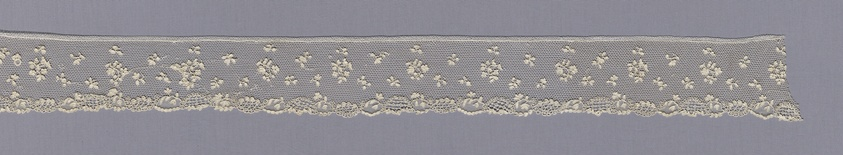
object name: Textile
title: Border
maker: France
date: 1775/1800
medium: Linen, needle lace of a type known as "Point d'Argentan" with buttonholed mesh ground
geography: France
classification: textile; lace - needle